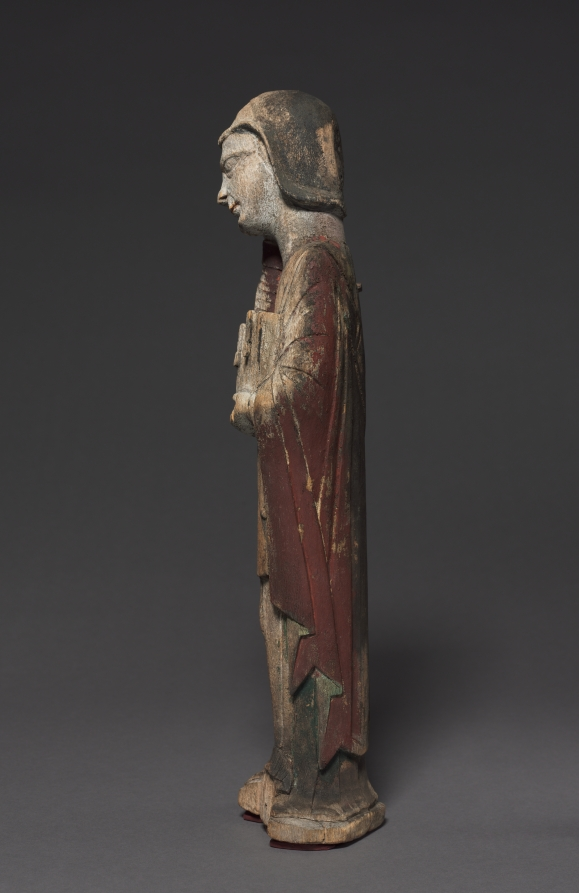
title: Mourning Saint John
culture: Austria, Region of Salzburg, Lungau?, 13th century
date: c. 1240–1260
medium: painted wood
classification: Sculpture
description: These traditional devotional figures at one time formed a Crucifixion group with a Crucified Christ (now lost). The ensemble may have been mounted high above the entrance to the sanctuary of a church on a barrier called a rood beam, beyond which lay people were not allowed. Crucifixion groups were common in medieval churches where they symbolized the sacrifice and real presence of Christ in the Mass.